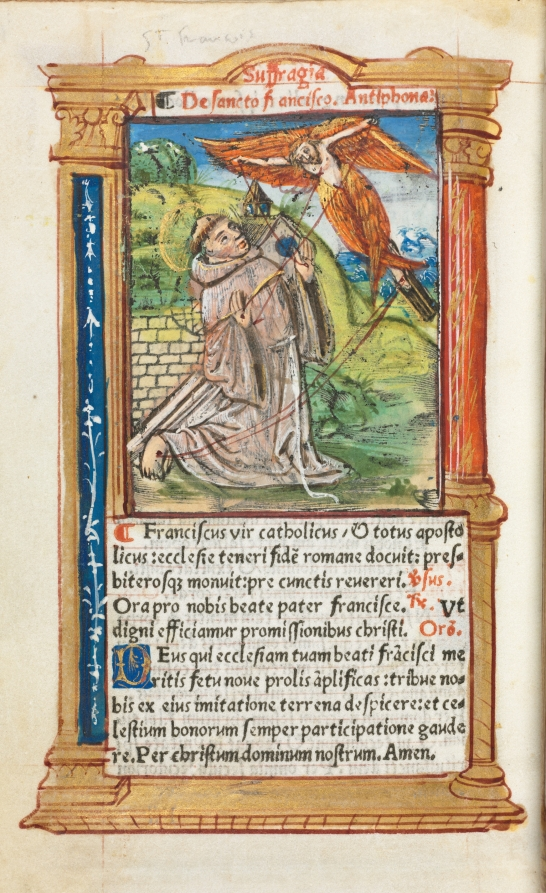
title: Printed Book of Hours (Use of Rome): fol. 106v, St. Francis of Assisi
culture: France, Paris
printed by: Guillaume Le Rouge (French, Paris, active 1493–1517)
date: 1510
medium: 112 Printed folios on parchment, bound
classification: Bound Volume